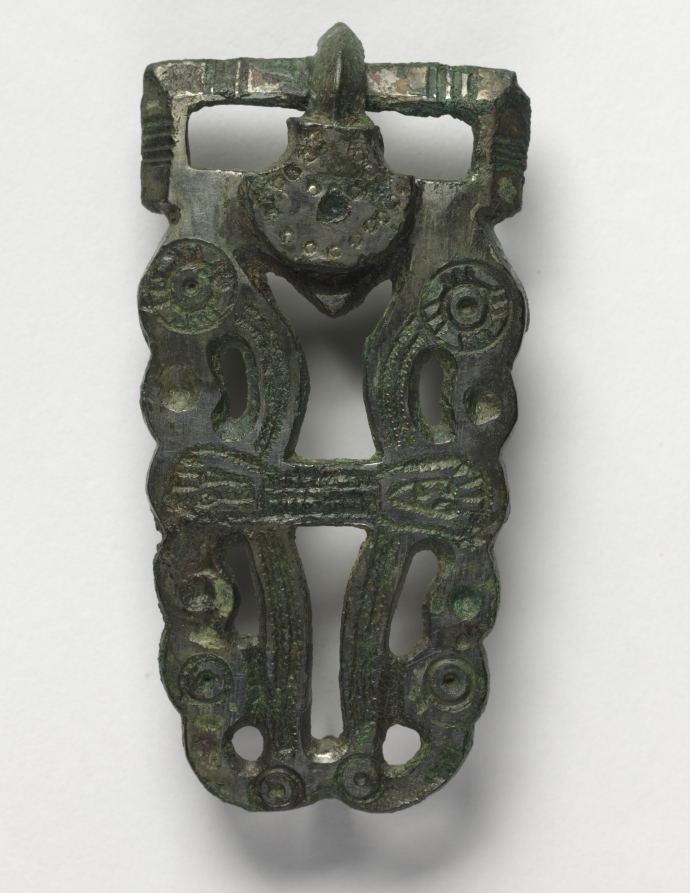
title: Buckle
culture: Frankish, Migration period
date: 600s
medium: bronze and silver overlay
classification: Jewelry